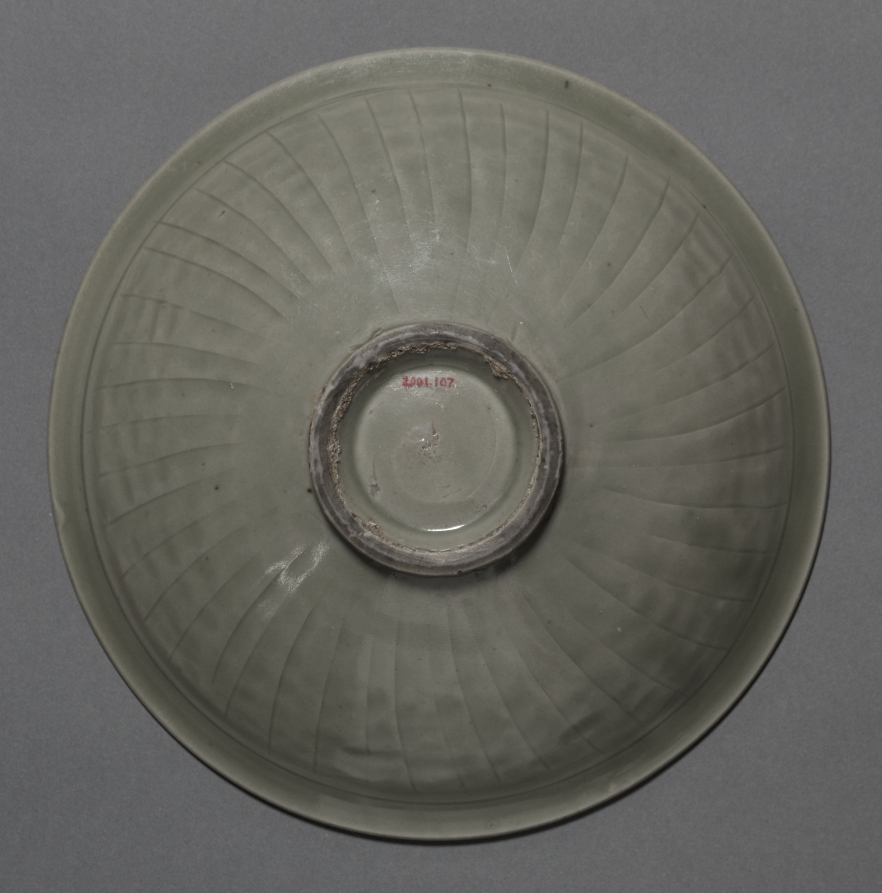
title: Bowl with Peonies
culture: China, Shaanxi province, Tongchuan, Huangbaozhen, Jin dynasty (1115-1234)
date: c. 1100s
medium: green-glazed stoneware with molded decoration, Yaozhou ware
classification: Ceramic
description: This type of pottery, called Yaozhou ware, is a type of celadon or greenware that is well-known for its distinctive molded decoration.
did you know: In East Asian art, peonies traditionally symbolize prosperity and wealth.